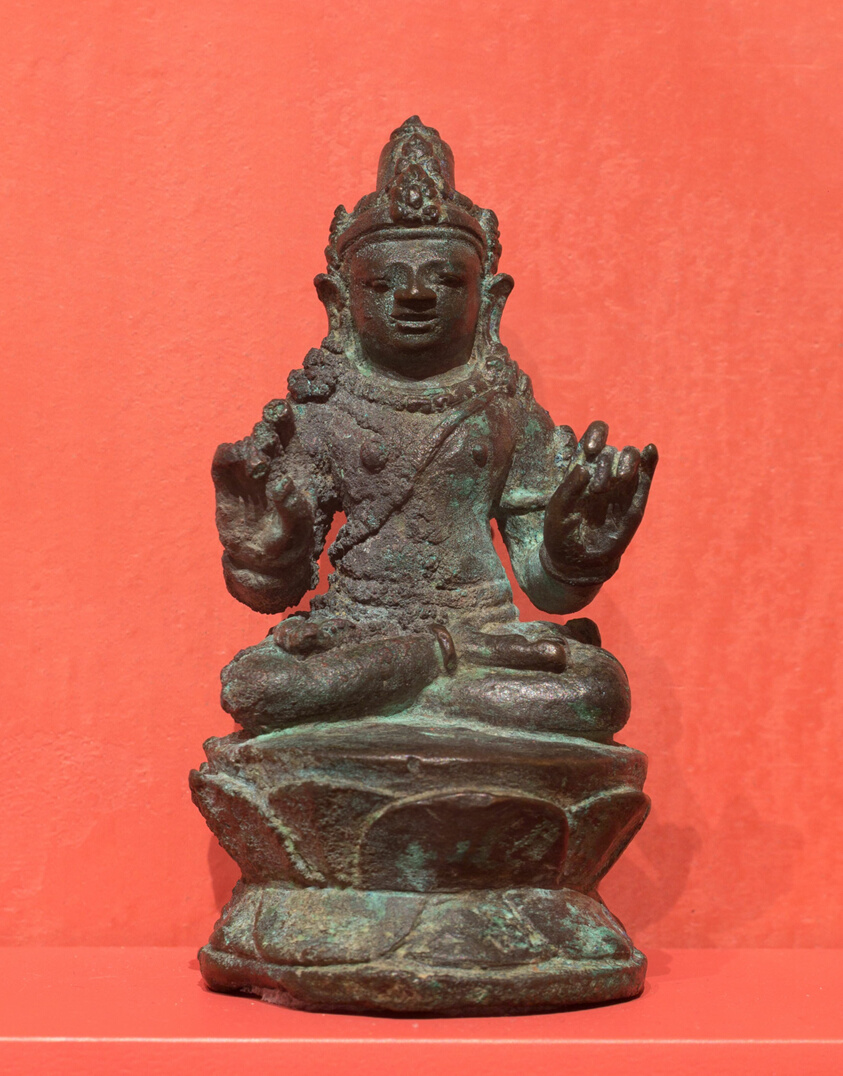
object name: Sculpture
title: Bodhisattva with Hands in Gesture of Teaching (Vitarkamudra)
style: Southeast Asian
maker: Indonesia; Central Java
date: 9th/10th century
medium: Bronze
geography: Central Java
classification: bronze; metal; sculpture; asian art